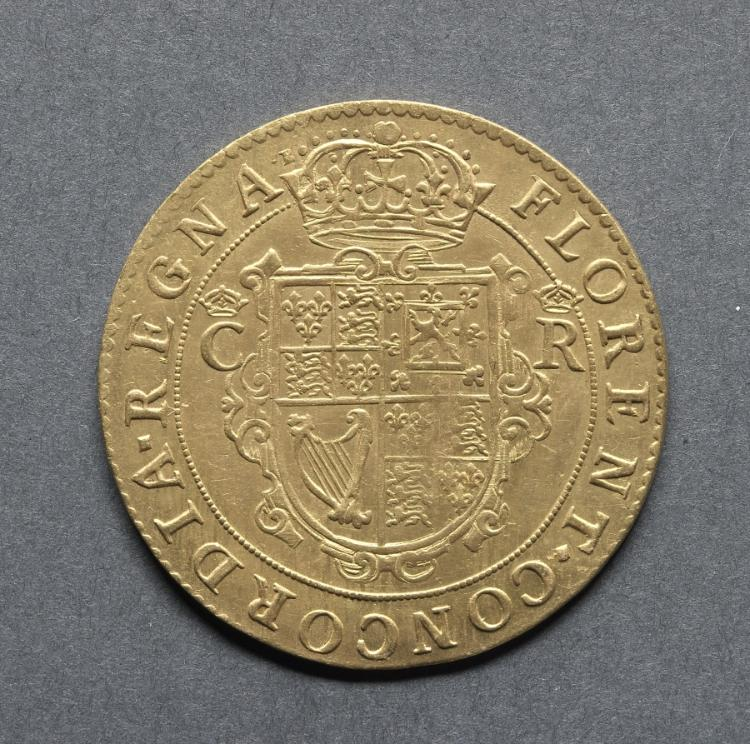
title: Unite: Crowned Shield (reverse)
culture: England, Charles I, 1625-1649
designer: Nicholas Briot (French, c. 1579–1646)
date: 1631–32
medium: gold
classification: Coins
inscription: FLORENT∙CONCORDIA∙REGNA C R